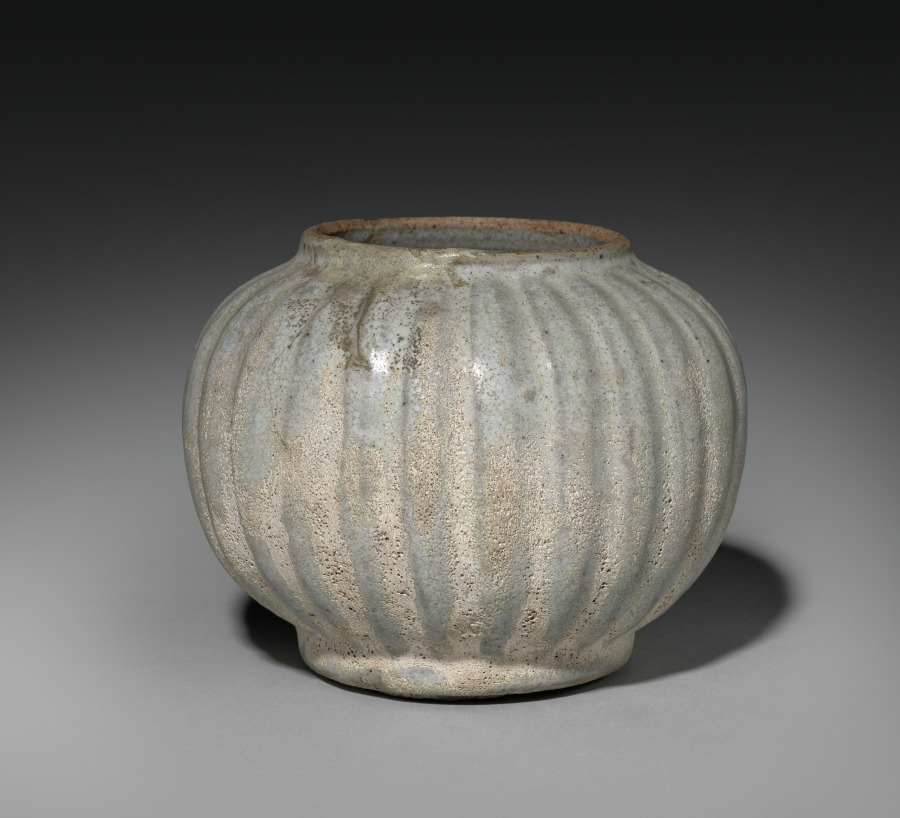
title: Jar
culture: Siam, Sawankhalok ware, late 13th-14th Century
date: late 1200s-1300s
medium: stoneware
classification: Ceramic